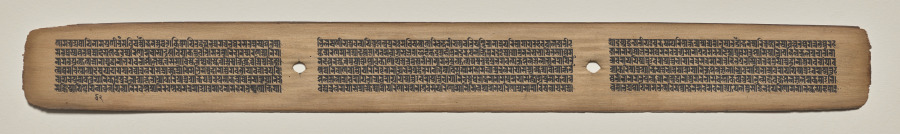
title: Text, folio 54 (recto), from a Manuscript of the Perfection of Wisdom in Eight Thousand Lines (Ashtasahasrika Prajnaparamita-sutra)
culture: Eastern India, Bihar, Vikramashila Monastery. Painting: Nepal, Kathmandu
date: Sunday, September 14, 1119 (year 239 of the Newar Samvat in the month of Ashvina)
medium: gum tempera and ink on palm leaves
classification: Painting